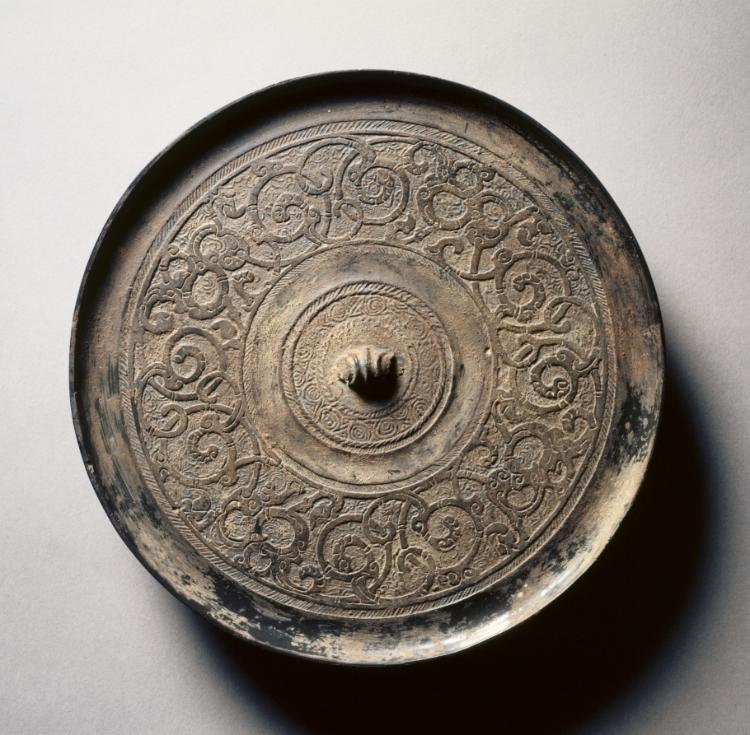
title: Mirror with Serpentine Interlaces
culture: China, Eastern Zhou dynasty (770–256 BCE), Warring States period (475–221 BCE)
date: early 400s–late 200s BCE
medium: bronze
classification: Metalwork